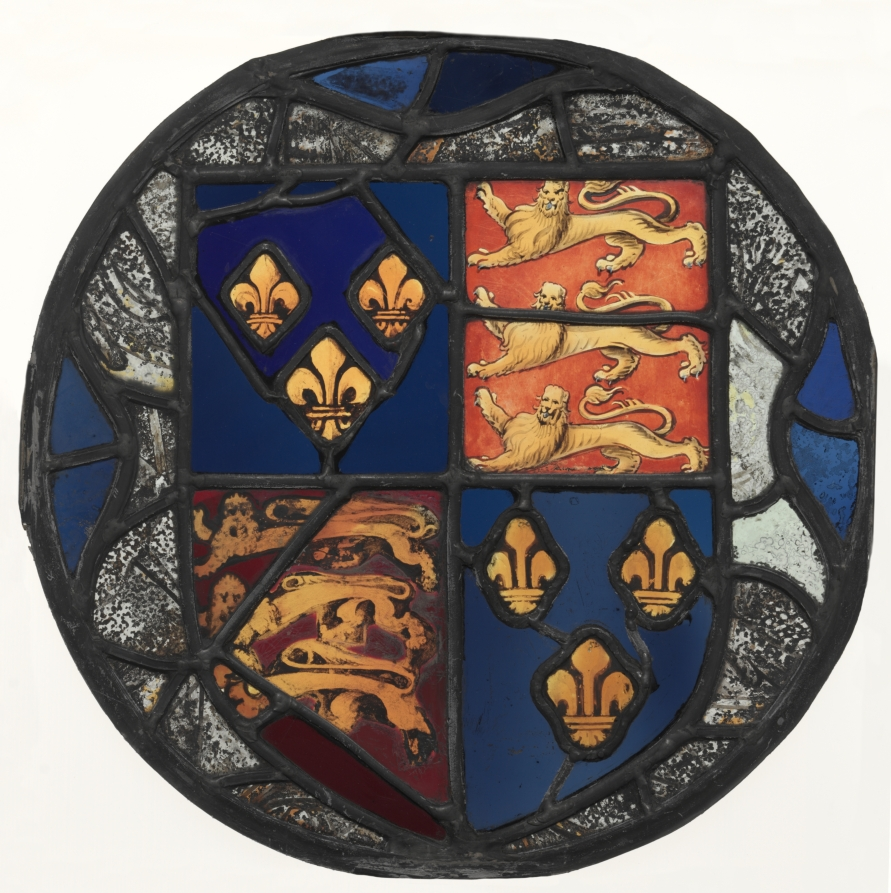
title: Heraldic Roundel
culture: England, 16th century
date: 1500s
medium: pot-metal and white glass, silver stain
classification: Glass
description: Upper (composite panel): Lions Rampant, guild emblems: Arms of the Isle of Man Lower: Arms of England (1406-1603) quartered with France (fleur-de-lis)